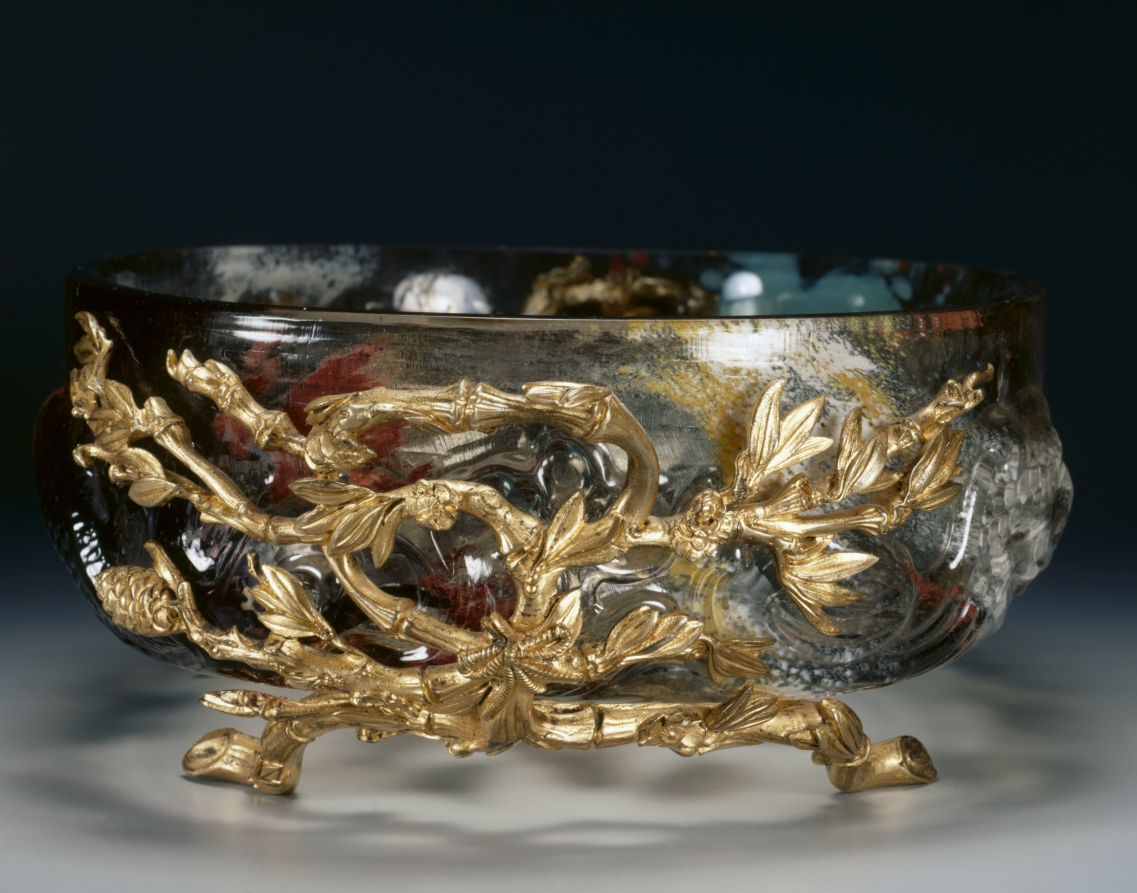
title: Centerpiece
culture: France, Paris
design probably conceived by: Eugène Rousseau (French, 1827–1891)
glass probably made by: firm of Appert Frères (French)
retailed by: firm of Escalier de Cristal (French)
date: c. 1880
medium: glass with gilt metal mounts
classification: Glass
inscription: on underside of glass: Escalier de Cristal. Paris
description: The retail firm of Escalier de Cristal seems not to have directly manufactured the wares they sold, but they exercised design control and sometimes brought together craftspeople of various talents and training to execute their stylish goods. Eugène Rousseau was not himself a craftsman, but he acted as a sort of editor, and glass and ceramics were made under his supervision. The glass of this bowl, with its cast relief decoration and colored inclusions, is of a kind associated with Rousseau. It is known that much of his glass was actually made by the firm of Appert Frères. In terms of style, this Centerpiece reflects the interest in things Japanese, which was an important element in the luxury goods made around 1880. The swimming fish and the naturalistic details of the gilt metal pinecones and twigs tied with string suggest this Asian source of inspiration.